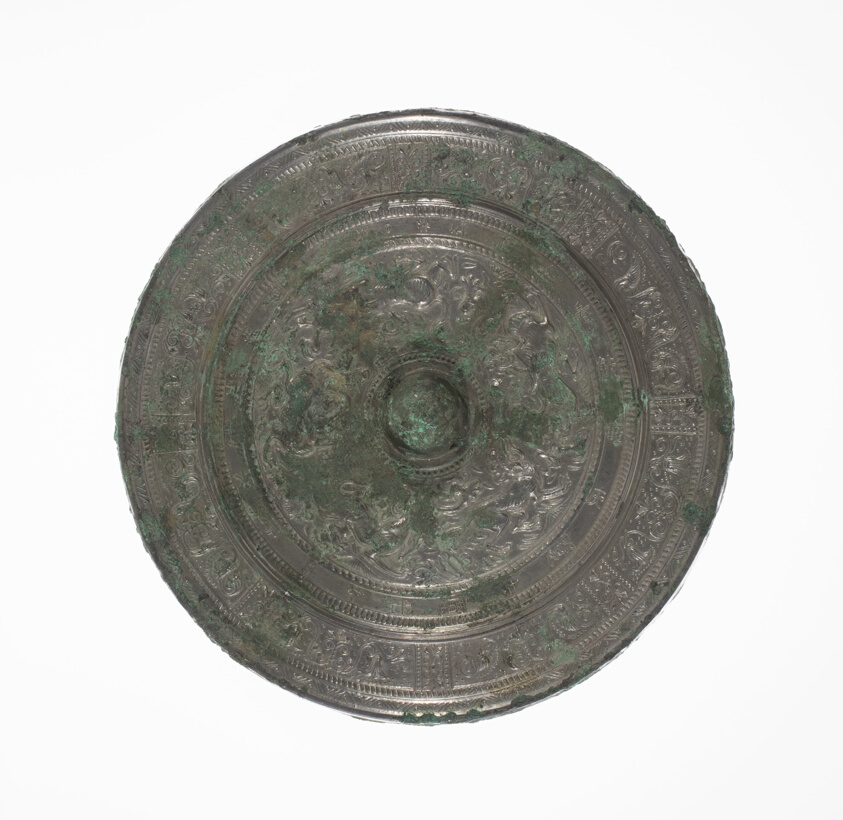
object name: Decorative Arts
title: Mirror with Mythical Creatures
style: Chinese (culture or style)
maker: China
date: Han dynasty (206 B.C.–A.D. 220) or later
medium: Bronze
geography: China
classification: bronze; metal; mirror; asian art; decorative arts